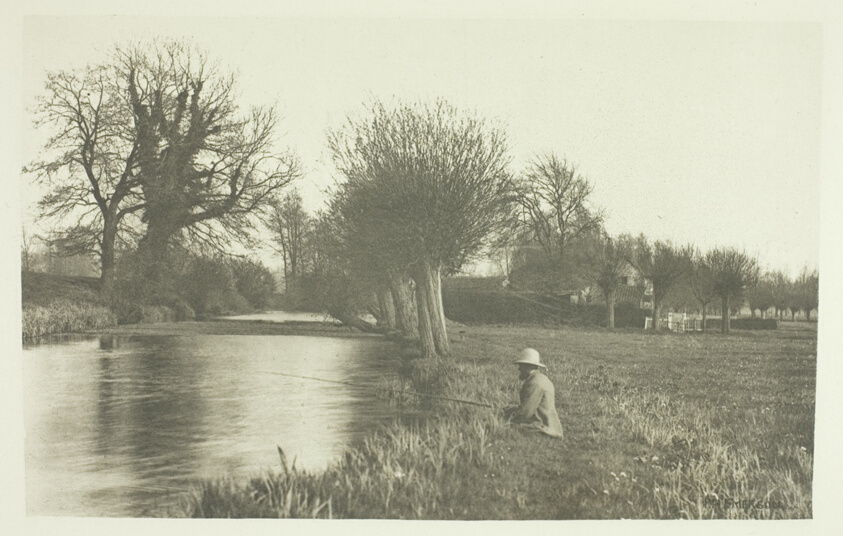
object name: Photograph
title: Keeper's Cottage, Amwell Magna Fishery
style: 19th century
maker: Peter Henry Emerson (English, born Cuba, 1856–1936)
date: 1880s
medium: Photogravure, plate V from the album "The Compleat Angler or the Contemplative Man's Recreation, Volume I" (1888)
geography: England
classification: photogravure; photomechanical process; photography; photograph